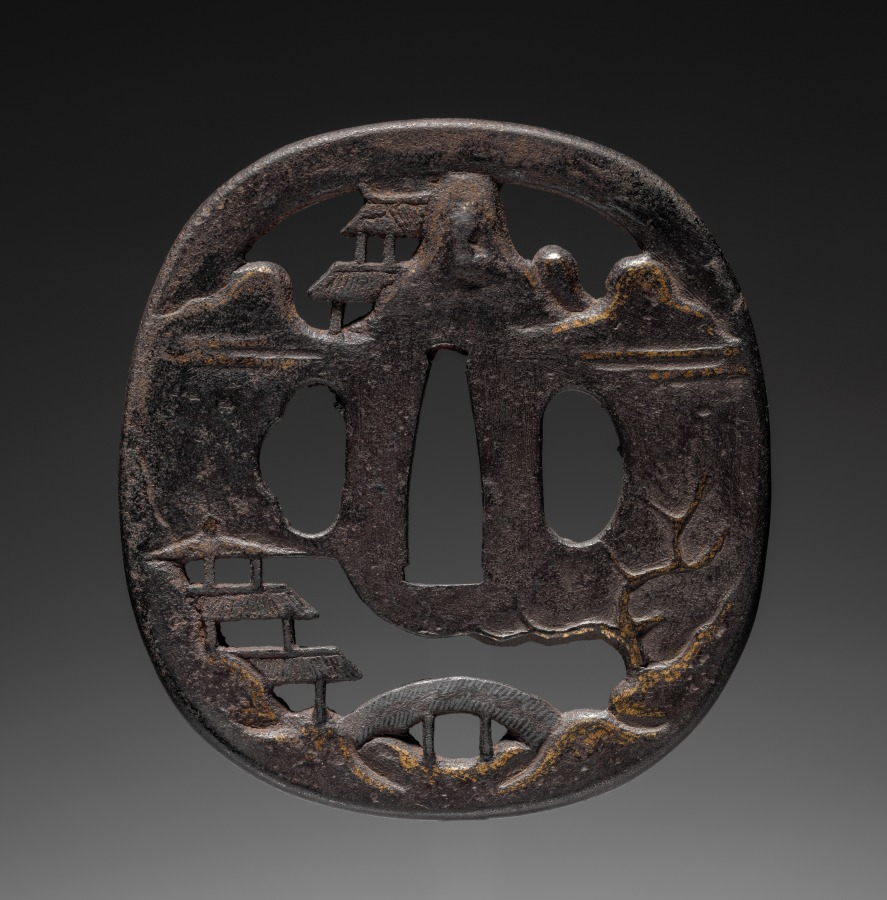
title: Sword Guard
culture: Japan, Edo period (1615–1868)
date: late 1600s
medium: iron (Jakushi type)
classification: Arms and Armor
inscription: signed "Jakushi."